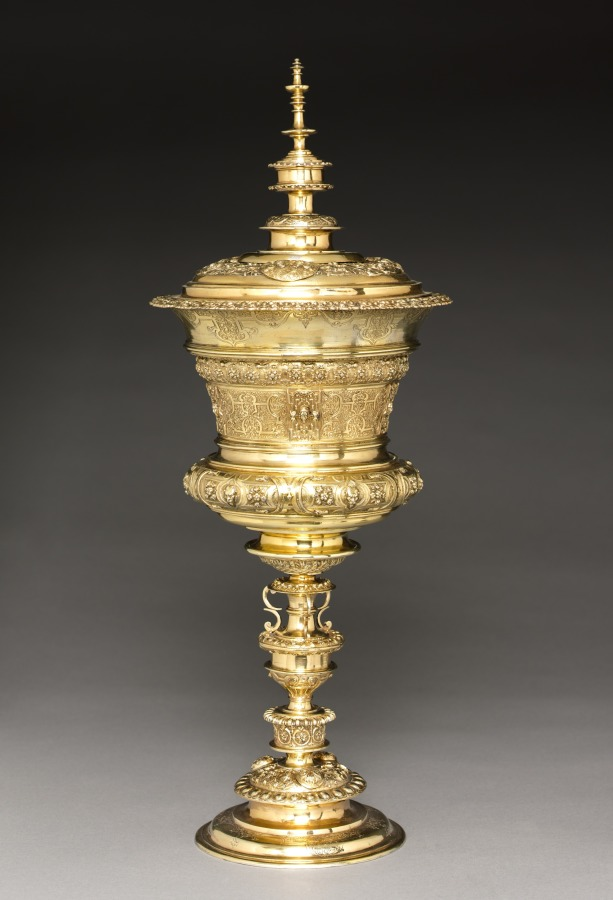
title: Standing Cup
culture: Germany, Nuremberg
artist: after a design by Virgil Solis (German, 1514–1562)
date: mid- to late 1500s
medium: gilt silver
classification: Metalwork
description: Large ceremonial silver cups with covers were a status symbol in the late 16th century, particularly when gilded like this superb example from Nuremberg. Stylish and grand, these cups provided the ultimate vessel from which a royal guest or aristocratic visitor could drink at a formal banquet. They came to be known as willkom, or welcome cups, as a result. The lid, mid-section, and base are all cast in sections, creating imposing height and stability for the great amount of silver used, a testament to the skill of the maker and the pocketbook of the owner.